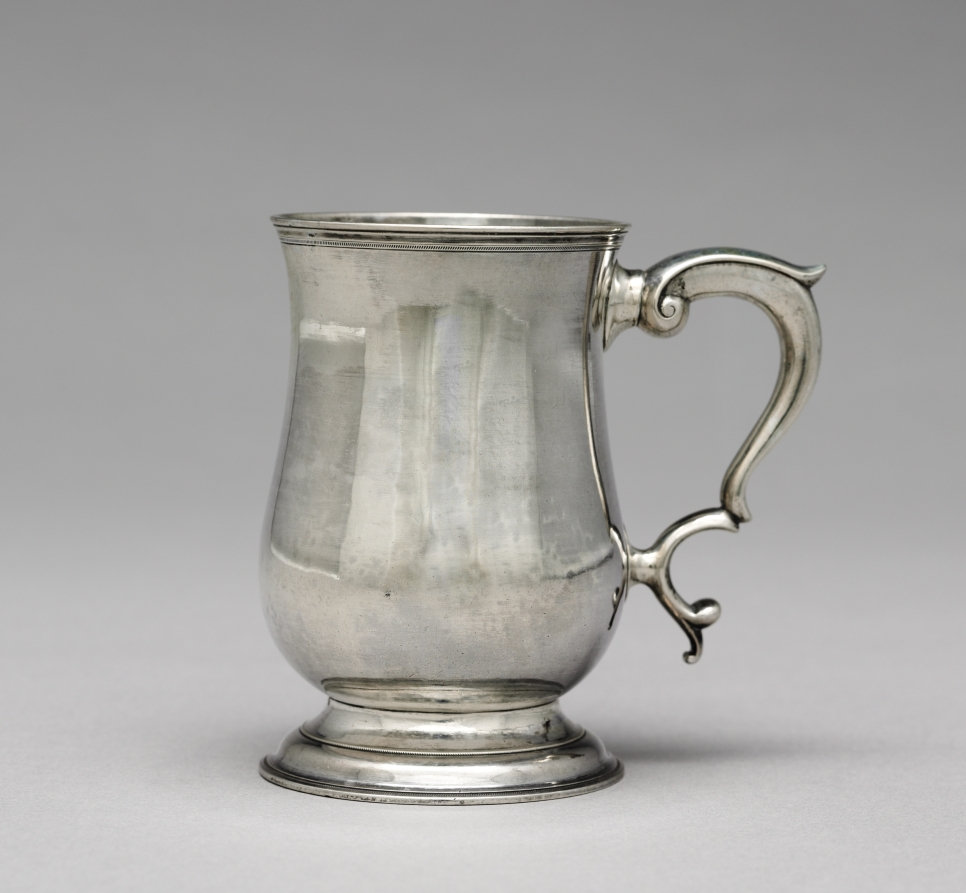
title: Cann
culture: America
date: c. 1750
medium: silver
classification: Silver